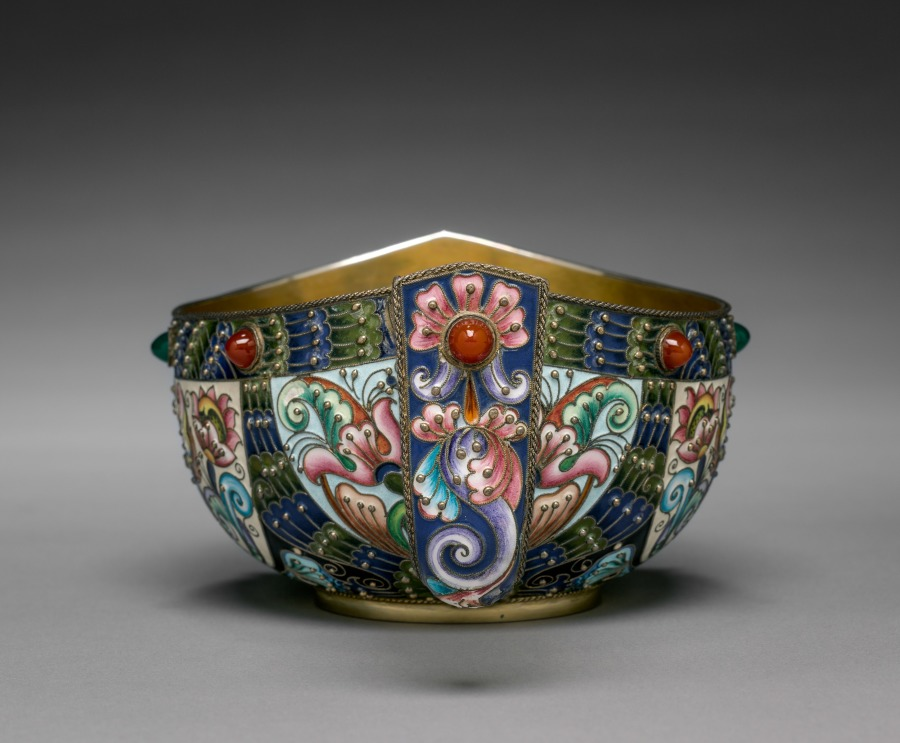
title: Kovsh (Wine Vessel)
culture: Russia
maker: House of Fabergé (Russian, 1842–1918)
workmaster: attributed to Feodor Ivanovich Rückert (Russian, 1840–1917)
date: 1896–1906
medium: silver gilt, enamel, cabochon gems, chrysoprases, carnelians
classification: Miscellaneous